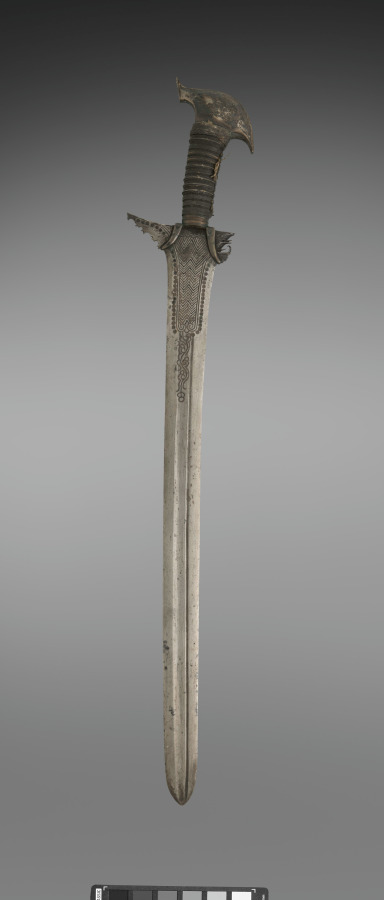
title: Sword (Kalis or Sundang)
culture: Philippines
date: before 1916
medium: Blade: metal with brass inlay; grip: cord; pommel: silver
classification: Arms and Armor